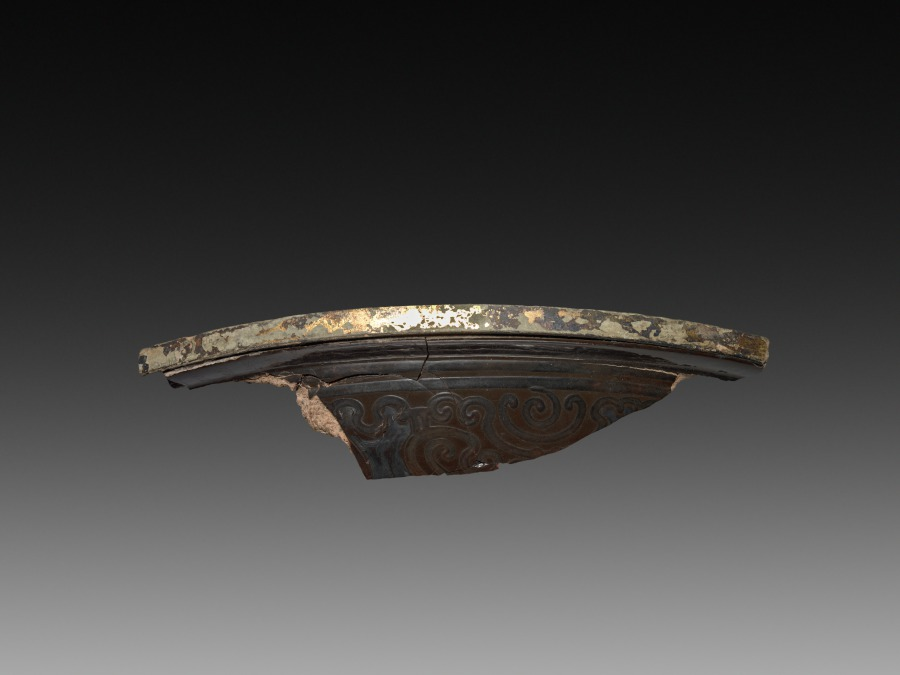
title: Fragment of a Lacquer Tray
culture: China, excavated at Lolang, Xin dynasty (9–23 CE)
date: 9–23 CE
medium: lacquer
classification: Lacquer